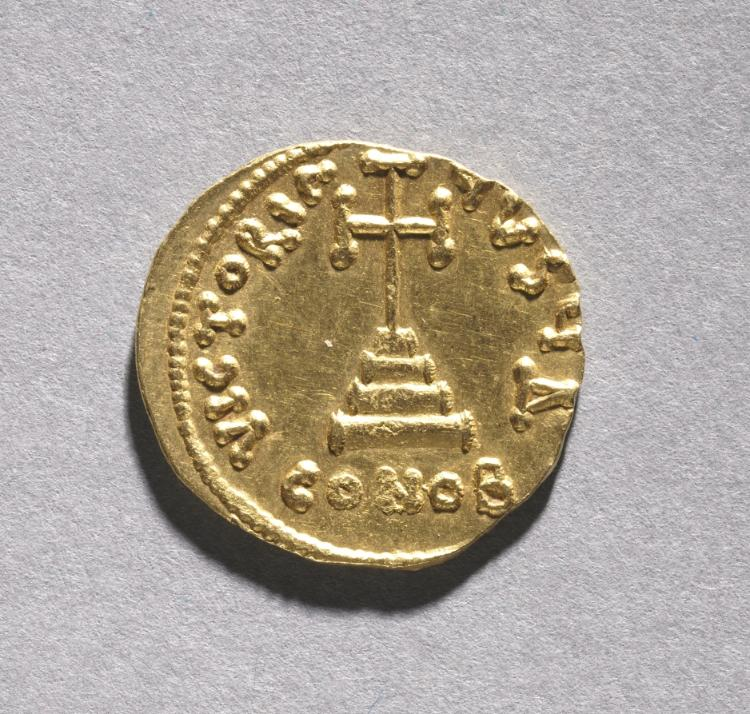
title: Solidus with Tiberius III Apsimarus (reverse)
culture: Byzantium, late 7th-early 8th century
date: 698–705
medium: gold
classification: Coins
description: The vast number of surviving Byzantine coins attests to the level of trade across the empire. Controlled and supervised by the emperor, the producers of coins took care to represent his authority and reflect his stature. Talented artists were recruited to engrave the dies (molds) used for the striking of coins. Emperors increasingly came to include their heirs and co-emperors on their coinage, as well as other family members or even earlier rulers. Coins were recognized, then as now, as small, portable works of art. With their inscriptions and images, Byzantine coins provide valuable documentation of historical events and a record of the physical appearance of the emperors. The coins shown here include the solidus, the basic gold coin of 24 karats; the tremissis, a gold coin of one-third the weight and value of the solidus; and the nomisma, which in the 10th century replaced the solidus as the standard gold coin.